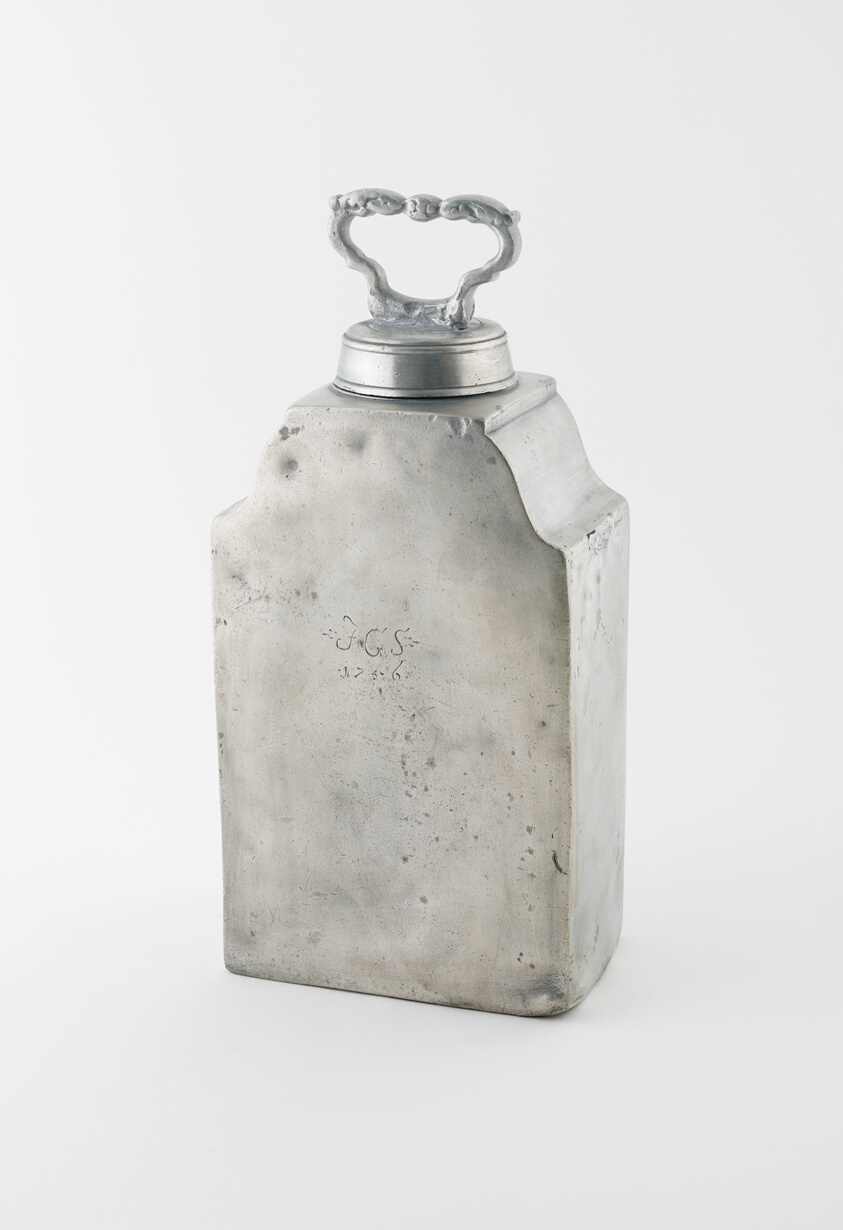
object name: Metalwork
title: Wine Can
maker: Germany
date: 1756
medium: Pewter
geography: Germany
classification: pewter; metalwork; european decorative arts